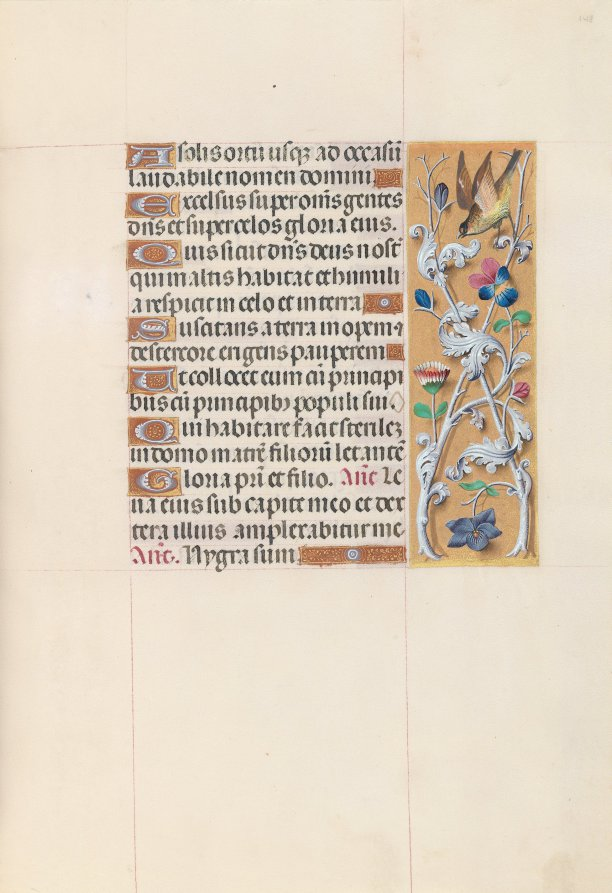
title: Hours of Queen Isabella the Catholic, Queen of Spain: Fol. 148r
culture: Flanders, Ghent and Bruges, late 15th century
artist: Master of the First Prayerbook of Maximillian (Flemish, c. 1444–1519)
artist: and Associates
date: c. 1500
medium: ink, tempera, and gold on vellum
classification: Bound Volume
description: This manuscript was illuminated by a circle of at least five highly organized manuscript painters active in the Flemish cities of Ghent and Bruges. The principal illuminator was Alexander Bening, who painted the majority of the book's miniatures. Manuscripts produced by this circle of artists are renowned for the decoration of their borders, which typically feature a rich variety of realistically-painted flowers, birds, and butterflies. This prayer book, called a book of hours, was intended not for a cleric, but for the private devotions of a lay person-in this case, Isabella the Catholic, Queen of Spain (1451-1504). Isabella's coat of arms embellishes the book's frontispiece. It is unlikely that the book was commissioned by the Queen herself; rather, she probably received it as a diplomatic gift from someone courting her patronage, perhaps Cardinal Francisco Jimenez de Cisneros. A Franciscan friar, Jimenez was dependent upon Isabella for his advancement, first to the post of Queen's confessor in 1492, and then to Archbishop of Toledo in 1495.